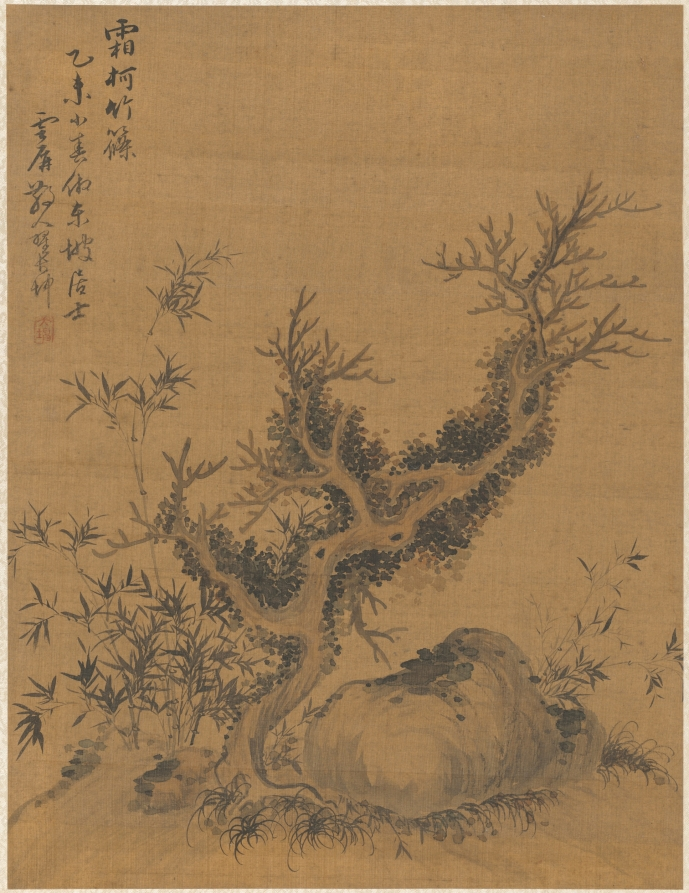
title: Frosted Branches and Dwarf Bamboo, in the Style of Su Shi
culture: China, Qing dynasty (1644-1911)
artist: Zhai Dakun (Chinese, d. 1804)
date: 1775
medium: album leaf; ink and color on silk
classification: Painting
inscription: Hoary ("Frosted") Branches and Dwarf Bamboo. In the tenth month of the year yiwei (1775), in the manner of Dongpo jushi (Su Shi, 1036–1101). Yunping jingren Zhai Dakun. Seal: r/r "Dakun"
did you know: The inscription says that this painting is done in the style of the Song dynasty period artist and poet Su Dongpo 蘇東坡 (1037–1101), who was also known as Su Shi.